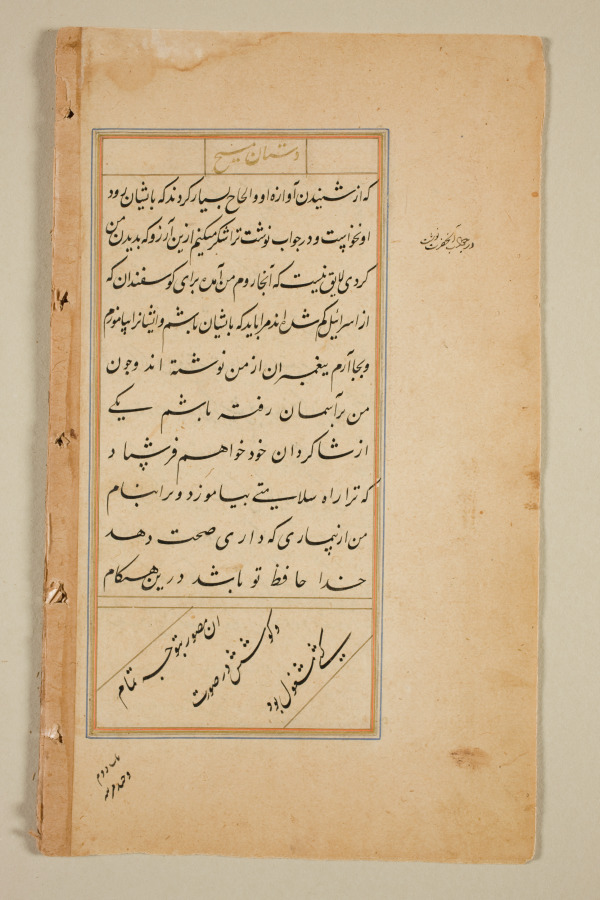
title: Text page from a Mirror of Holiness (Mir’at al-quds) of Father Jerome Xavier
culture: Mughal India, Allahabad, made for Prince Salim (1569–1627)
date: 1602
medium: Ink and gold on paper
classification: Manuscript